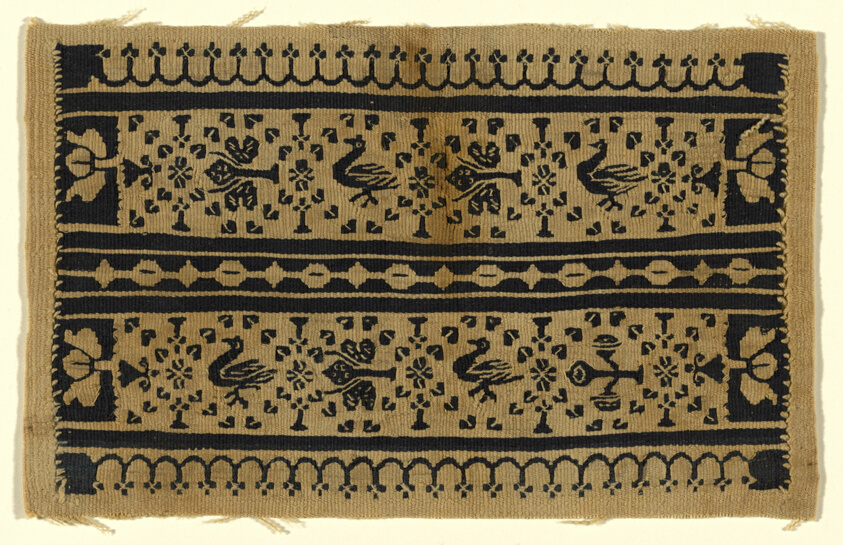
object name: Textile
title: Sleeve Band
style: roman period (egyptian), coptic (period)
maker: Coptic (Egypt)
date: Roman period (30 B.C.–641 A.D.), 5th/6th century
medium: Wool, tapestry weave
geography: Egypt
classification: textile; weaving; costume; dress (garment); clothing